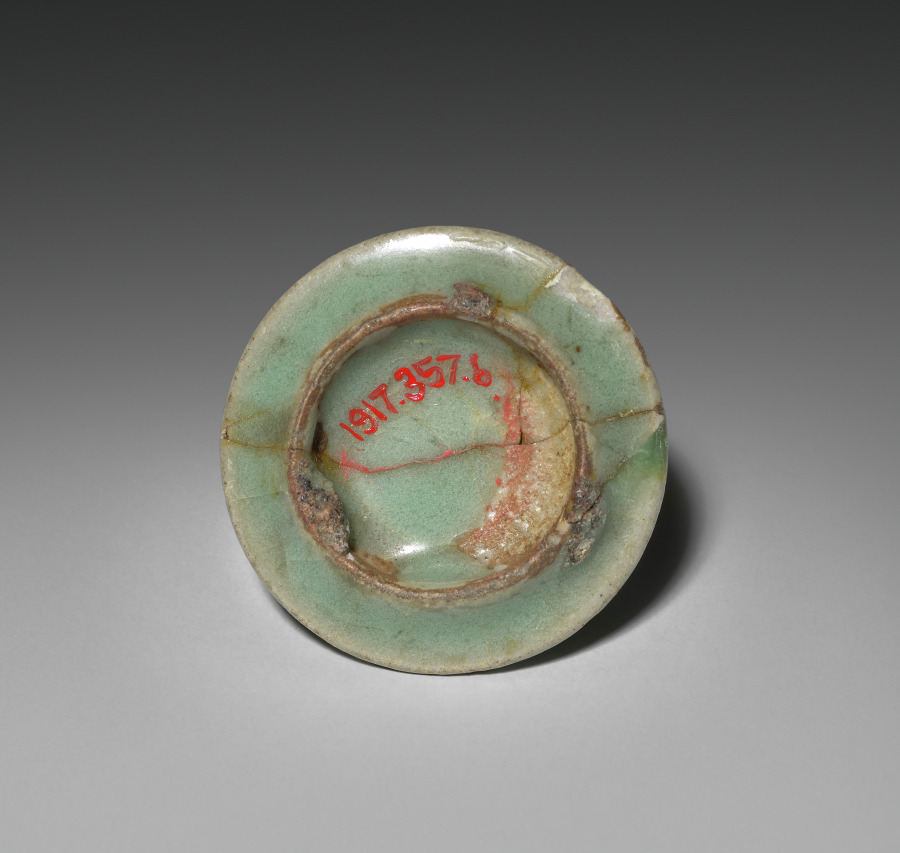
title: Cover for a Pitcher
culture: Korea, Goryeo dynasty (918–1392)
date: 1100s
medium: celadon ware with inlaid white and black slip decoration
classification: Ceramic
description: As early as the seventh century, the practice of drinking tea and wine became an important part of elite leisure culture in Korea. This lid once served as a lid for a tea pot.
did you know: During the Goryeo period, a variety of types of tea ware were widely used. This lid once served as a lid of a teapot.